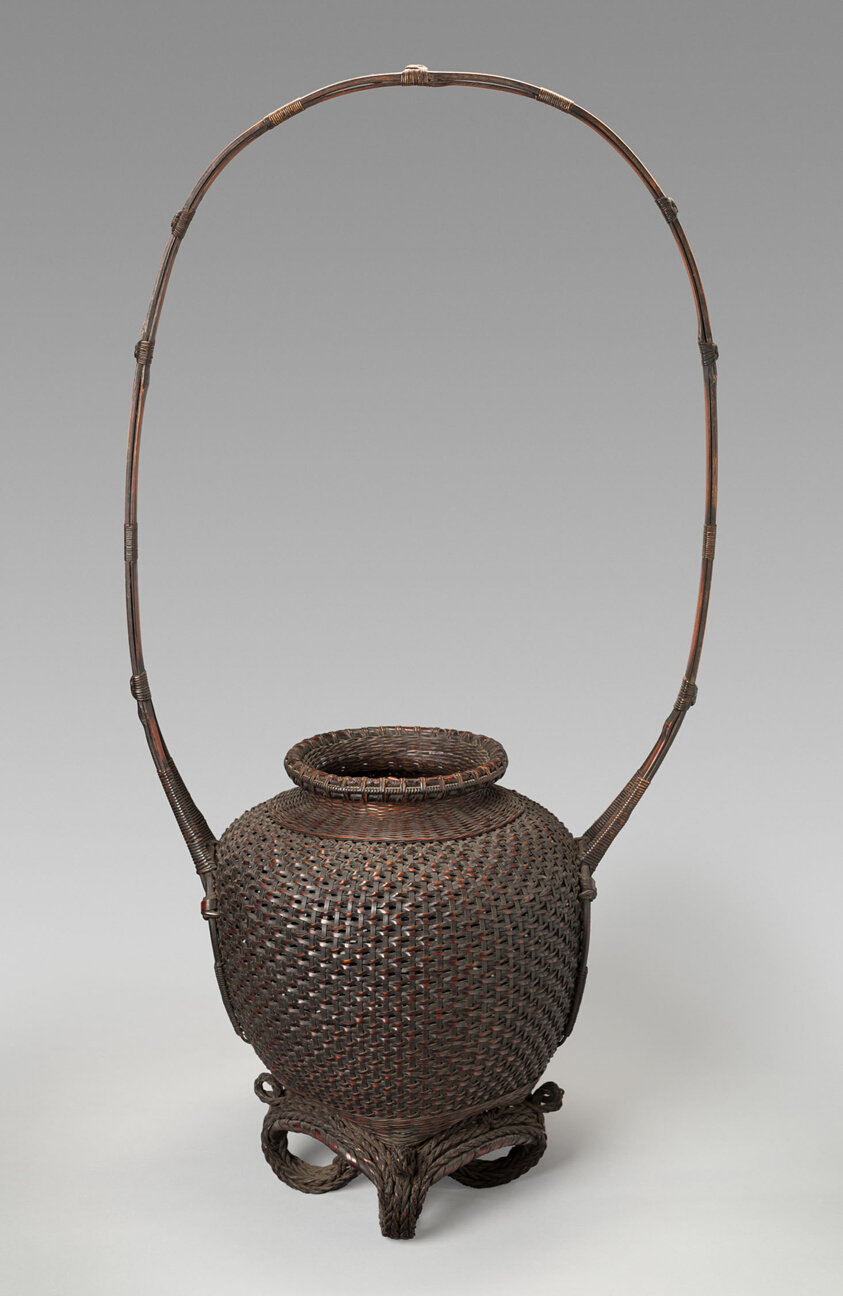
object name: Decorative Arts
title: Peony Basket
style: Japanese (culture or style)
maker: Japan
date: 19th century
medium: Bamboo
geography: Japan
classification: basketry; decorative arts